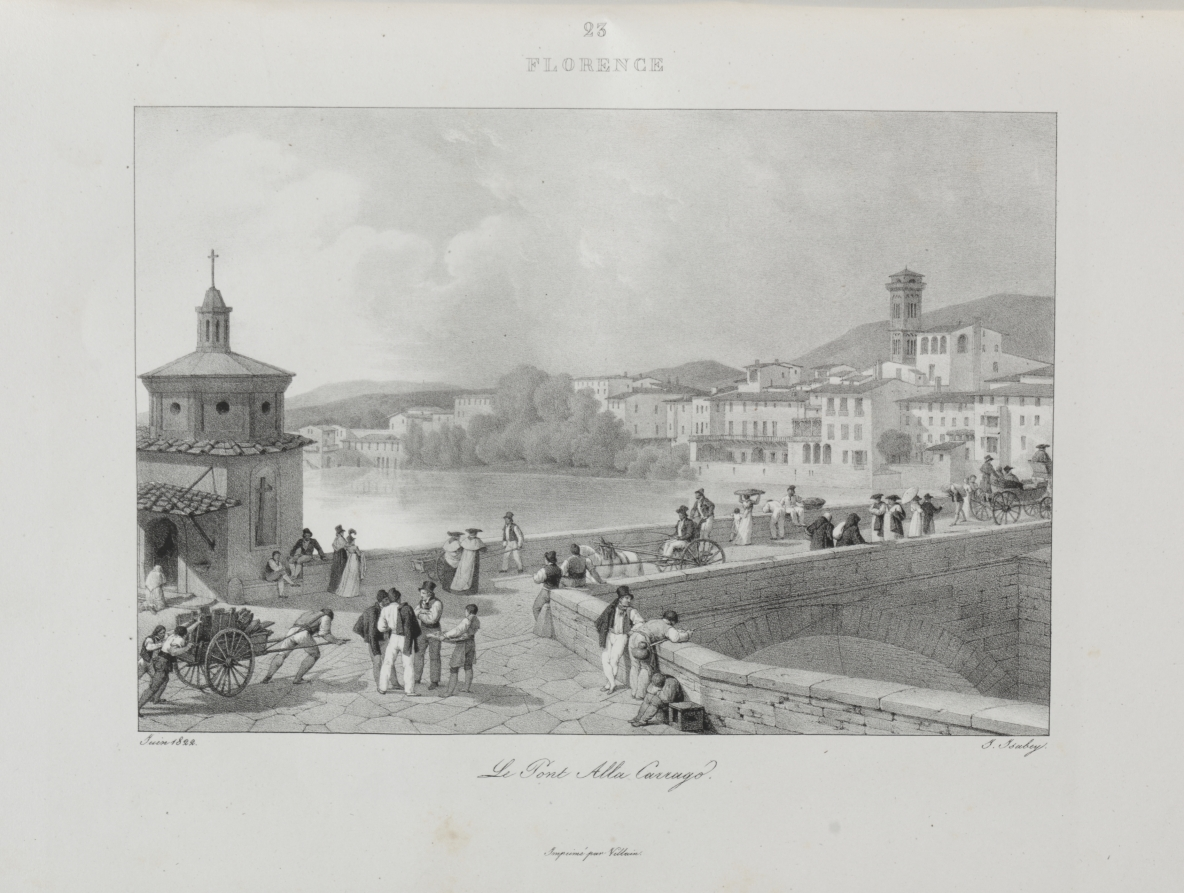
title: Voyage en Italie en 1822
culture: France, 19th century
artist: Jean-Baptiste Isabey (French, 1767–1855)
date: 1833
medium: lithograph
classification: Bound Volume